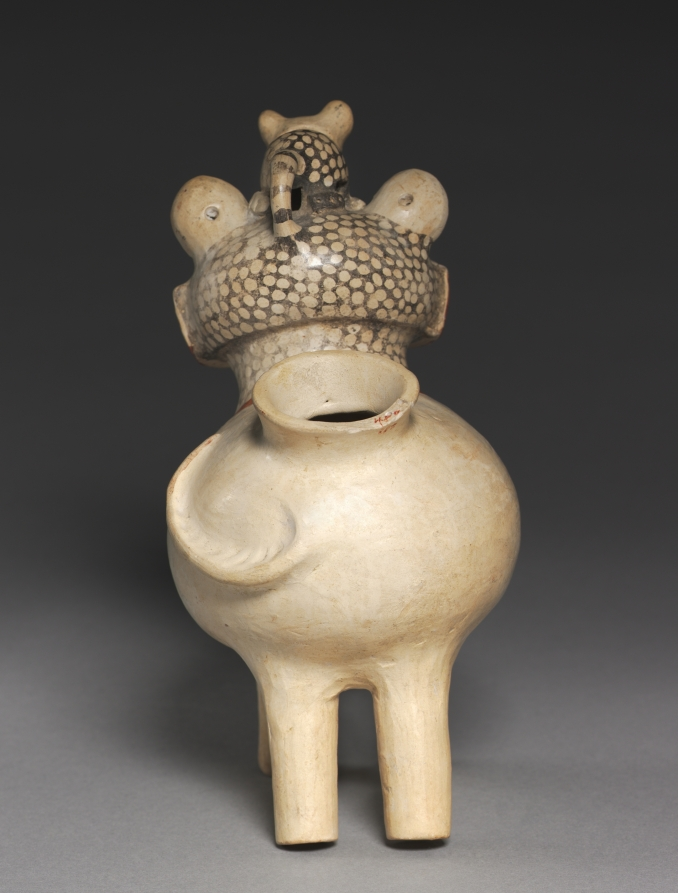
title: Feline Vessel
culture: Central Andes, North Highlands, Recuay people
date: 1–700 CE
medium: ceramic, red and white slips, black pigment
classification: Ceramic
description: Recuay art is under-studied and it is difficult to know the meaning of the wonderfully stylized feline on whose head perches a small passenger that may be a coatimundi, a nosy, busy, racoon-like animal. Elsewhere in Recuay art, felines are shown as virile predators, making it likely that in general they were symbols of leadership. The feline is painted with white and red slips; after firing, a resist application of black pigment was used to create the dotted pattern.